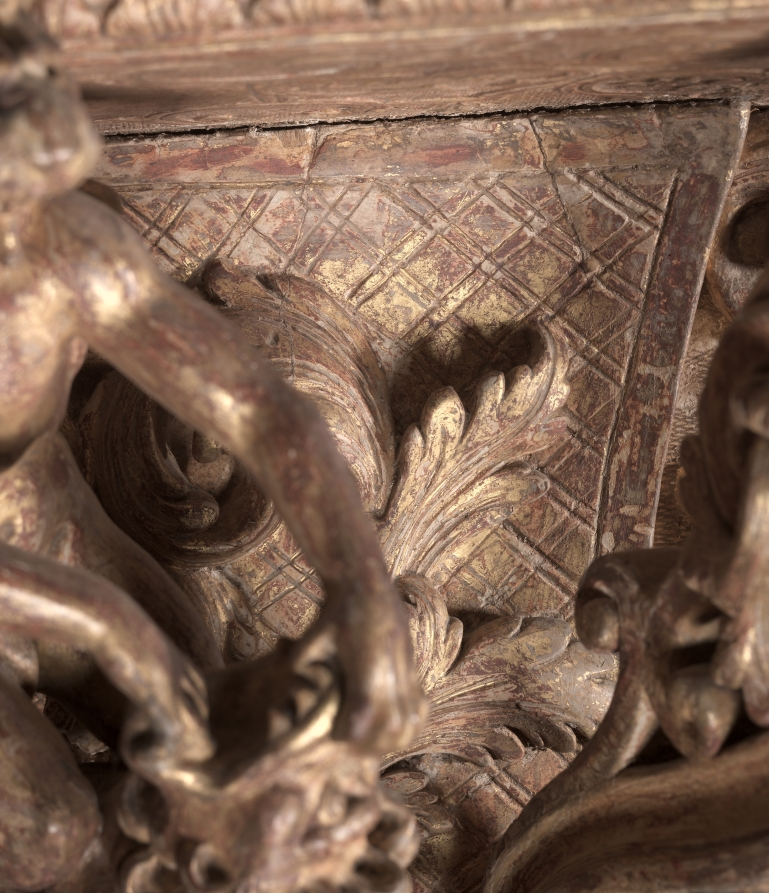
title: Wall Bracket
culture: France, 17th century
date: c. 1650–75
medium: carved and gilt wood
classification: Furniture and woodwork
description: The carved decoration depicts Hercules and the Nemean lion.